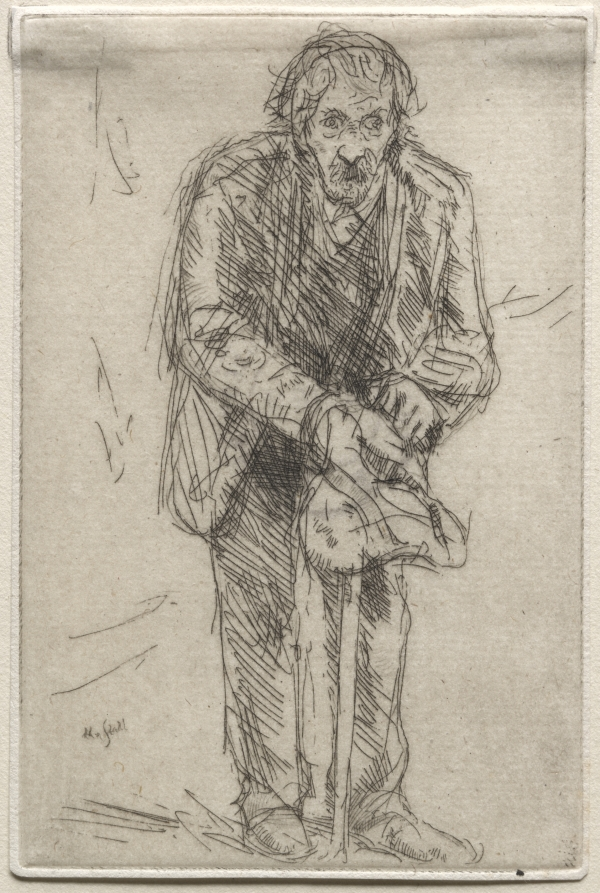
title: Paris: The Old Lunatic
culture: America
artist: Ernest Haskell (American, 1876–1925)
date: 1910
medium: etching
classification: Print